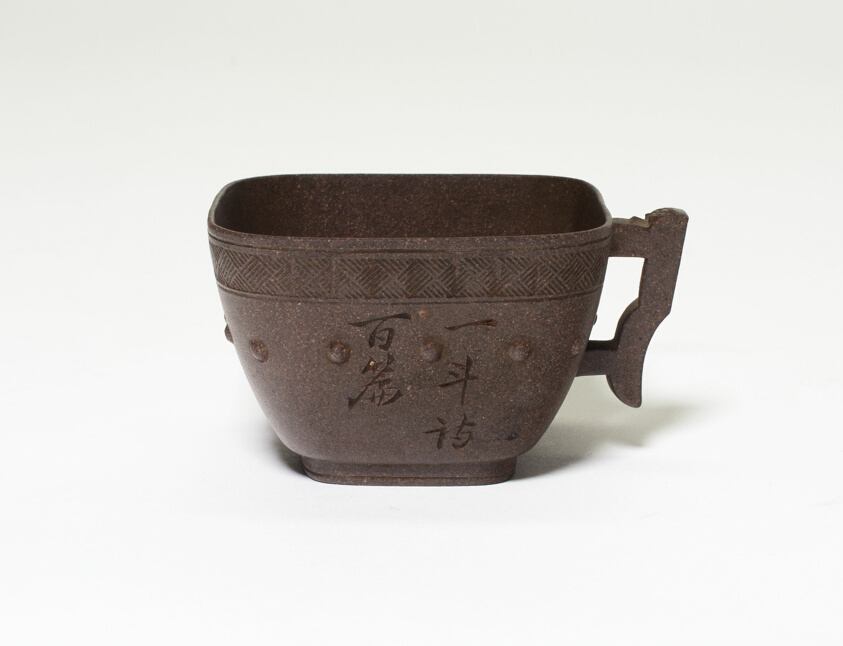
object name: Vessel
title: Square Cup with Molded Studs and Carved Inscription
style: Chinese (culture or style)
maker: Yu Yunwei; Chinese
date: Qing dynasty (1644–1911), Daoguang period (1821–1850)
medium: Yixing stoneware with underglaze molded, carved, and incised decoration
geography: China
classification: drinking vessel; stoneware; ceramics; asian art; vessel